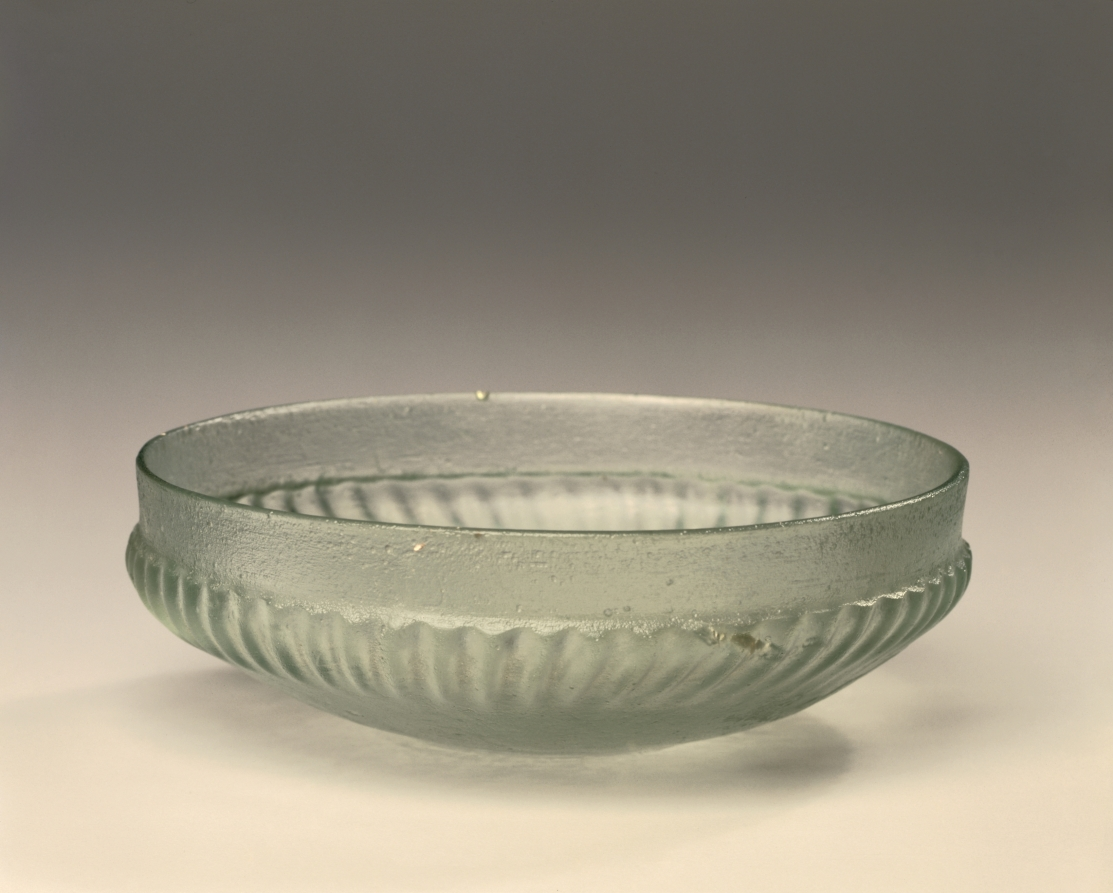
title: Shallow Ribbed Bowl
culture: Roman, Eastern Mediterranean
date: 50 BCE–100 CE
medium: glass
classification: Glass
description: Shallow ribbed glass bowls, often light blue, green, or turquoise in color, are a fairly common ancient glass vessel type. They were likely made by blowing or pressing molten glass into molds, sometimes leaving visible air bubbles within the glass matrix. After cooling, an artisan would rotate the bowl on a wheel or lathe, using a gentle abrasive to smooth out imperfections.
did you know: Shallow ribbed bowls could have multiple uses: eating, drinking, libations, and more.